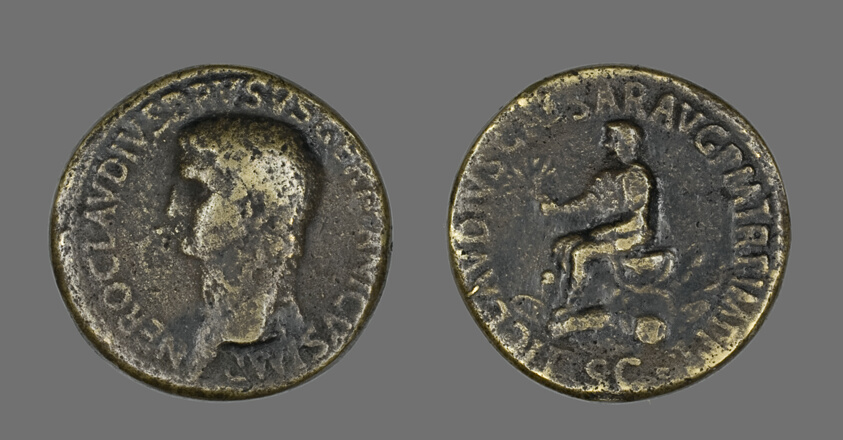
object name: Coin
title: Sestertius (Coin) Portraying Drusus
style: imperial (roman), ancient, roman (ancient, style or period)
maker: Roman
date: 43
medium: Bronze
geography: Roman Empire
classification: coin; ancient art